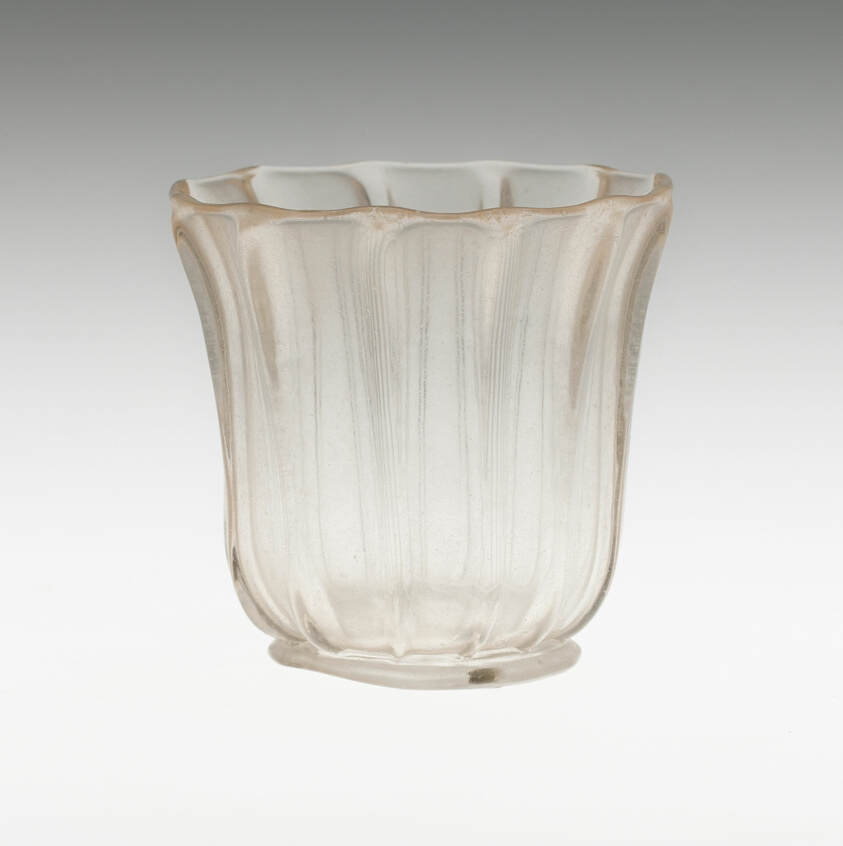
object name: Glass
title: Bowl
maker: France, Nevers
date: 17th century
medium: Glass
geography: Nevers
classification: bowl; glass; dish (vessel); european decorative arts